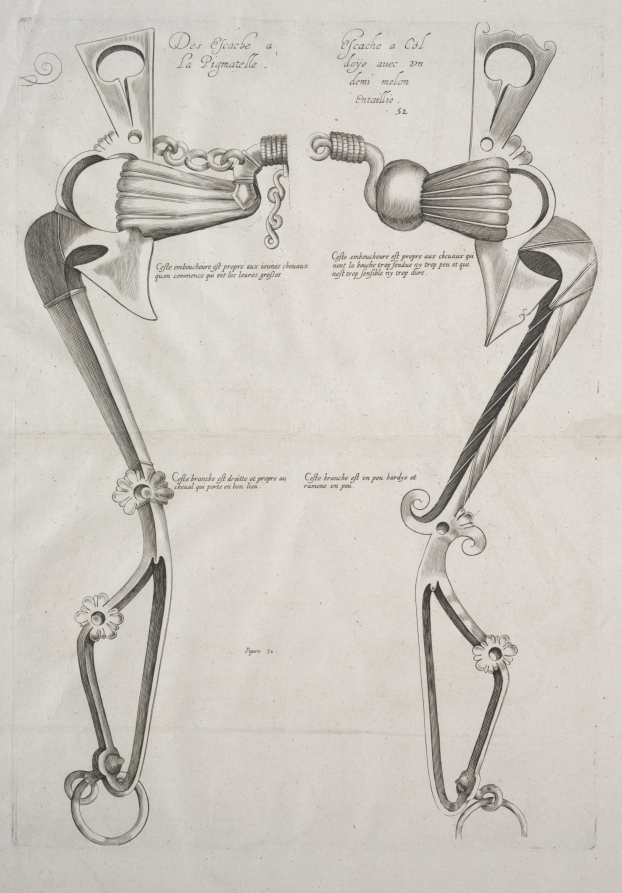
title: Diagram for Horse's Bit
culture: France, 18th century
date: 1700s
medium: etching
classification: Print